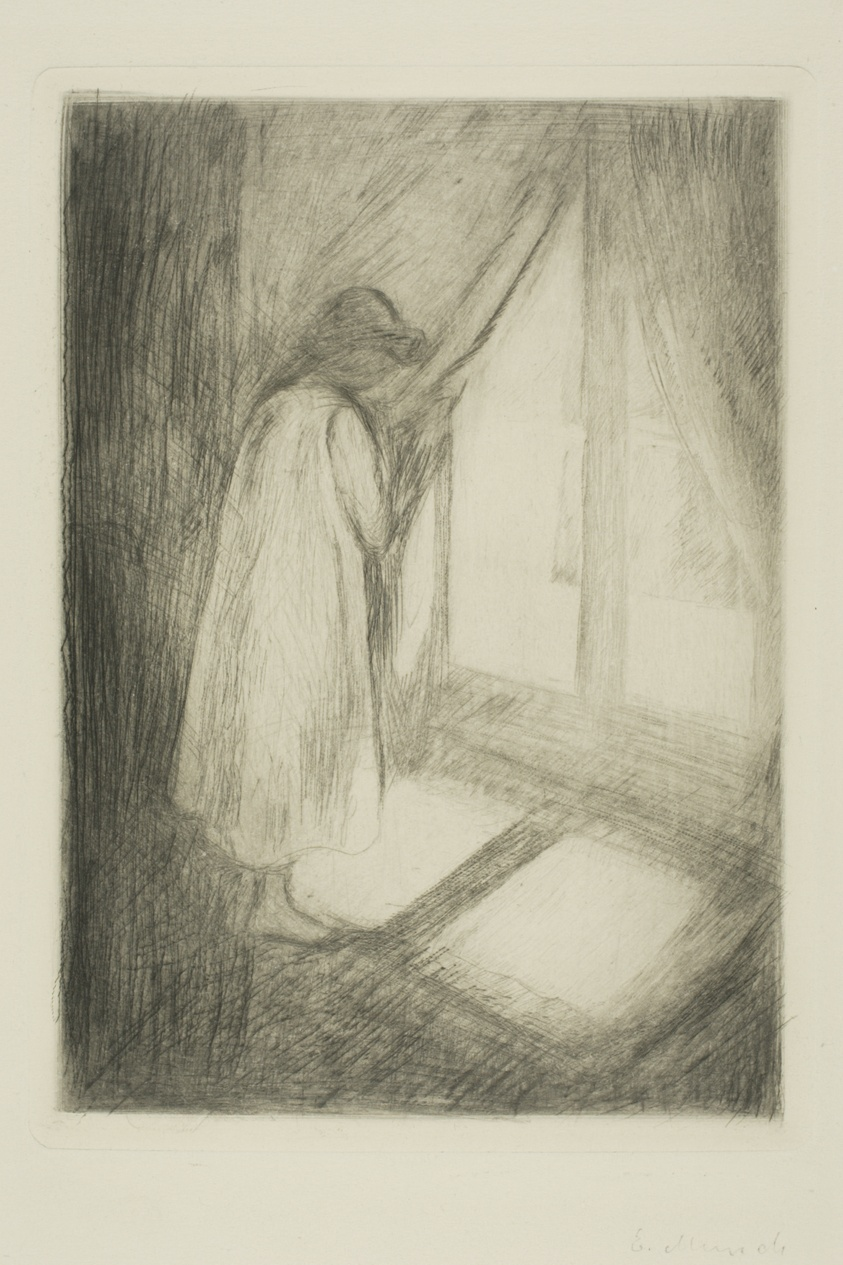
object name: Print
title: The Girl at the Window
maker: Edvard Munch (Norwegian, 1863-1944)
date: 1894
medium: Drypoint, roulette and burnishing in black on cream wove paper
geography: Norway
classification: etching; print; prints and drawing